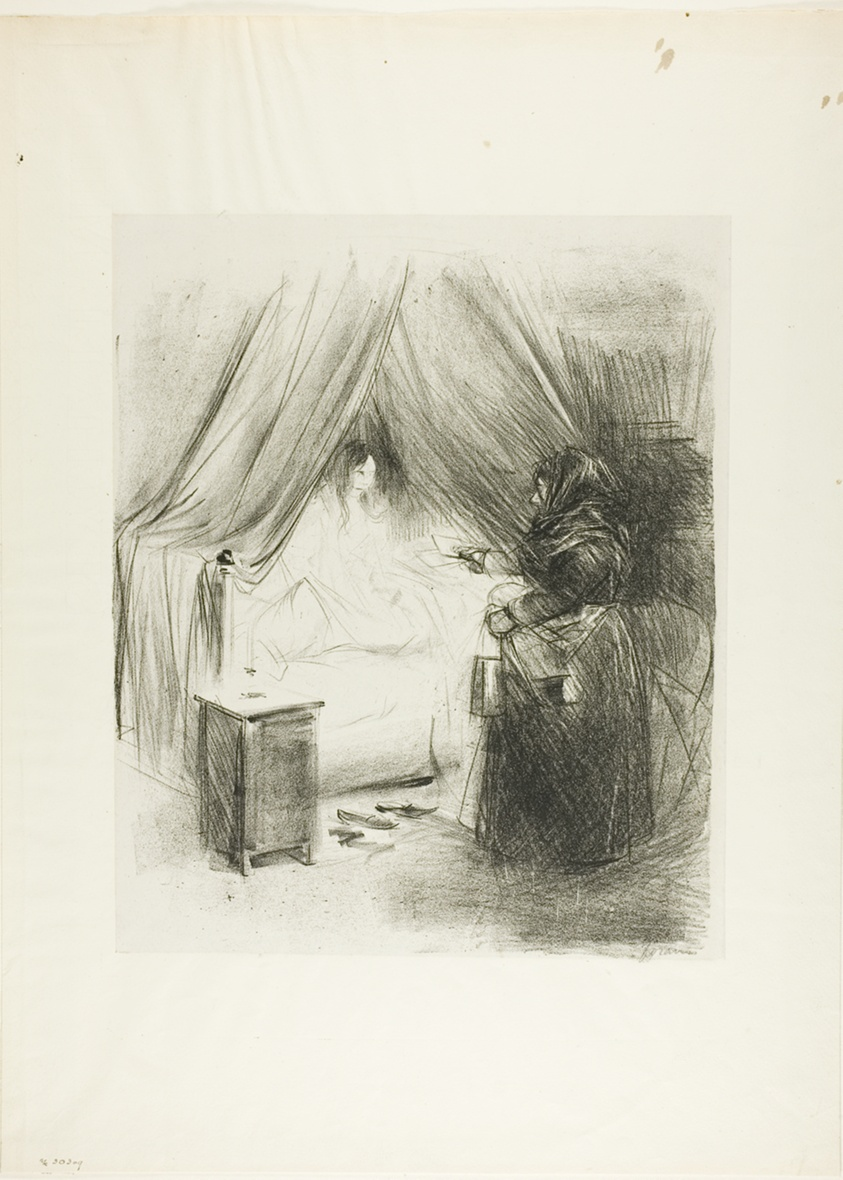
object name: Print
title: Breakfast (vertical plate)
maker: Jean Louis Forain (French, 1852-1931)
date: c. 1895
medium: Lithograph on off-white China paper laid down on ivory wove paper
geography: France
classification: lithograph; print; prints and drawing